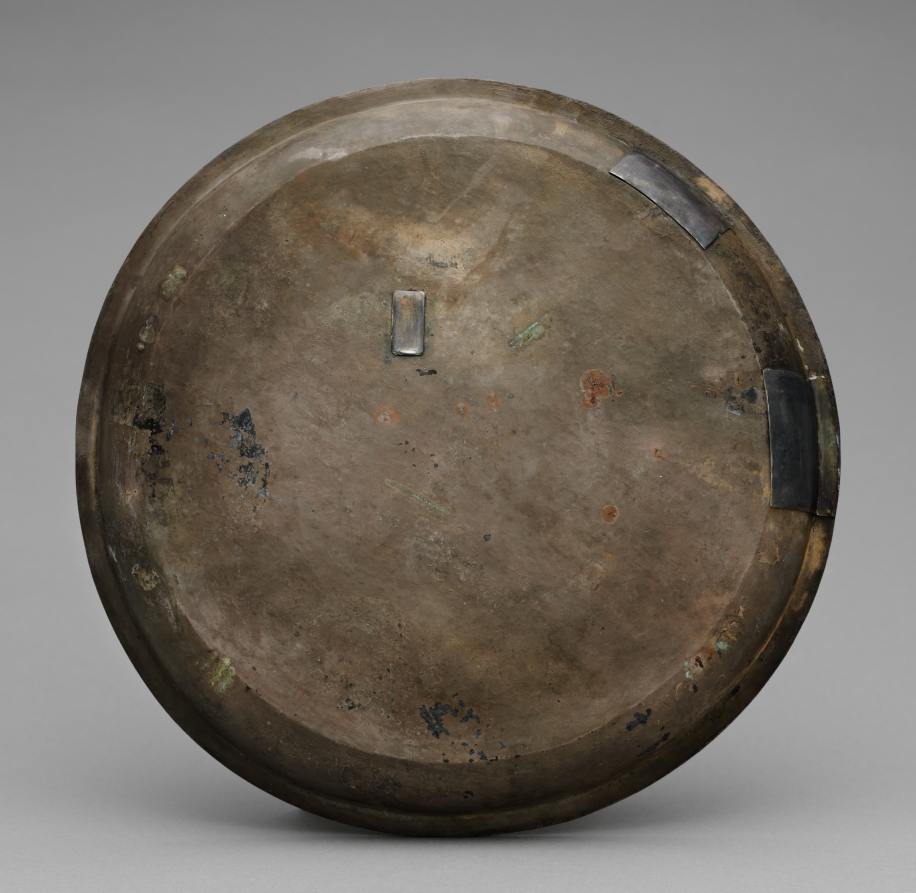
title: Paten (Dedicated to Saint Sergius) from the Beth Misona Treasure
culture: early Byzantium, Constantinople or Syria, Byzantine period, 6th-7th Century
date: c. 500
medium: silver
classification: Metalwork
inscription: the Greek inscription surrounding the cross in the center translates as: + Having vowed, DOMNOS, son of ZACHEOS, has offered (this paten) to St. Sergois of the village of Beth Misona.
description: These four liturgical silver vessels—a paten and three chalices (1950.378–81)—form what is now called the Beth Misona Treasure, named for the village in northern Syria for which the objects were made. While nothing is known about the exact location and circumstances of the treasure's discovery, the people of the village of Beth Misona were, like other Christian communities in Syria and Palestine, probably forced to bury their church silver to hide it from the Persians or Arabs, who conquered their lands in the first half of the 600s. The paten, which held pieces of Eucharistic bread used during Mass, is decorated with an engraved Latin cross surrounded by a dedicatory inscription that names the paten's donor—Domnos—and its original location, the church of Saint Sergios in Beth Misona. The chalices, which contained the Eucharistic wine used during Mass, feature broad cups decorated with portrait busts of Saints Peter and Paul, Christ, and the Virgin. One chalice bears a dedicatory inscription naming its donor—Kyriakos, Domnos's son—and the priest of the church that received the pious gift—Zeno.